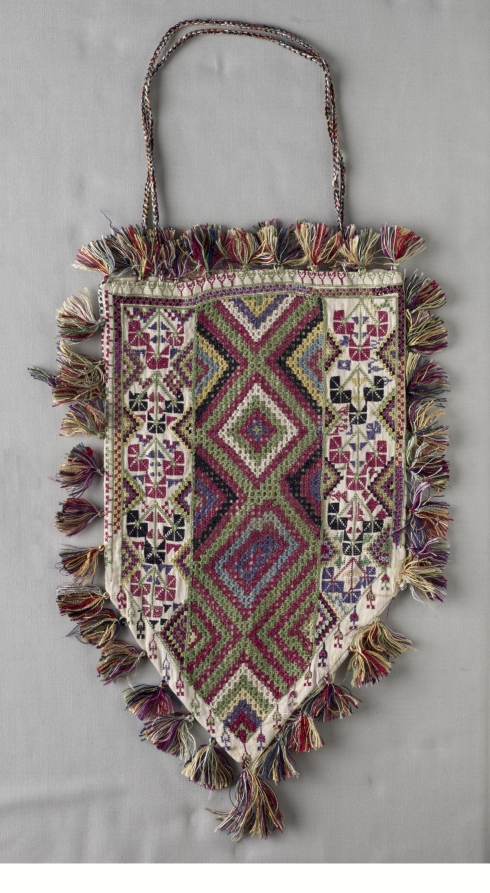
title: Bag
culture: Turkey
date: before 1957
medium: silk embroidery on cotton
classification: Embroidery